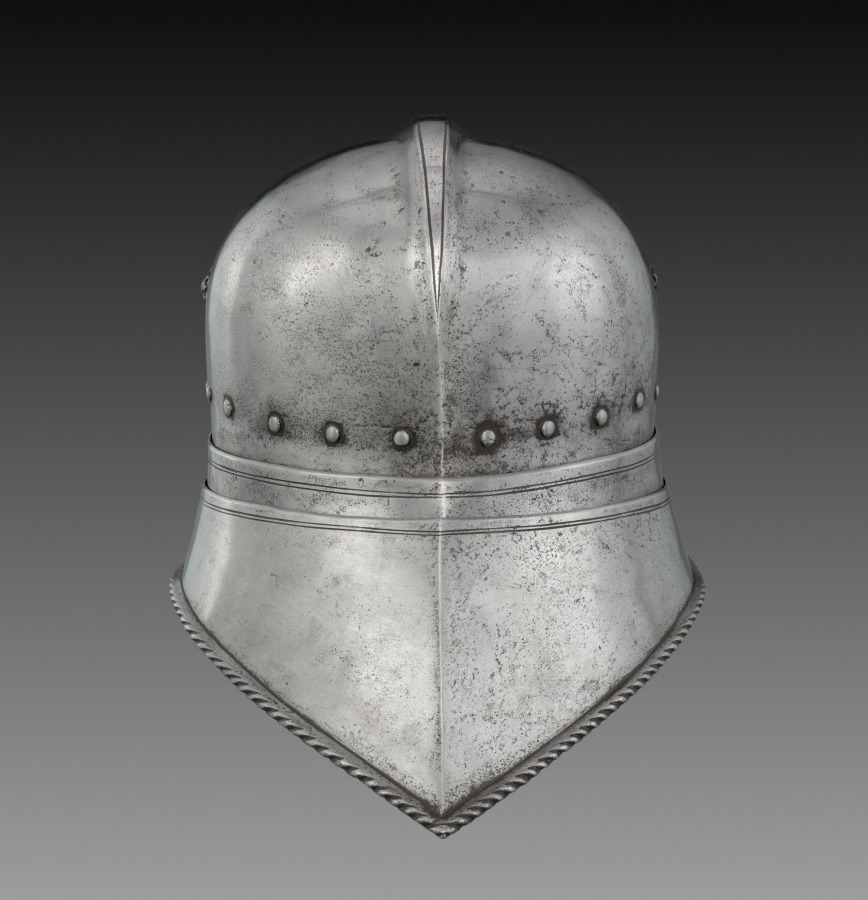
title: Visored Sallet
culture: Germany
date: c. 1490–1500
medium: steel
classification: Arms and Armor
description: The sallet is a partly open-face helmet common in Europe during the 1400s, used in both equestrian and infantry versions. Sallets with movable visors, like this example, are considered to be more technically and visually interesting; beautifully streamlined, it assumes a highly sculptural teardrop shape. Originally it would have been part of a complete suit of armor. The sallet became the quintessential helmet form of the late Middle Ages and is frequently represented in medieval miniatures and woodcuts.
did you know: Medieval sallets were design inspiration for modern-day fireman's helmets.